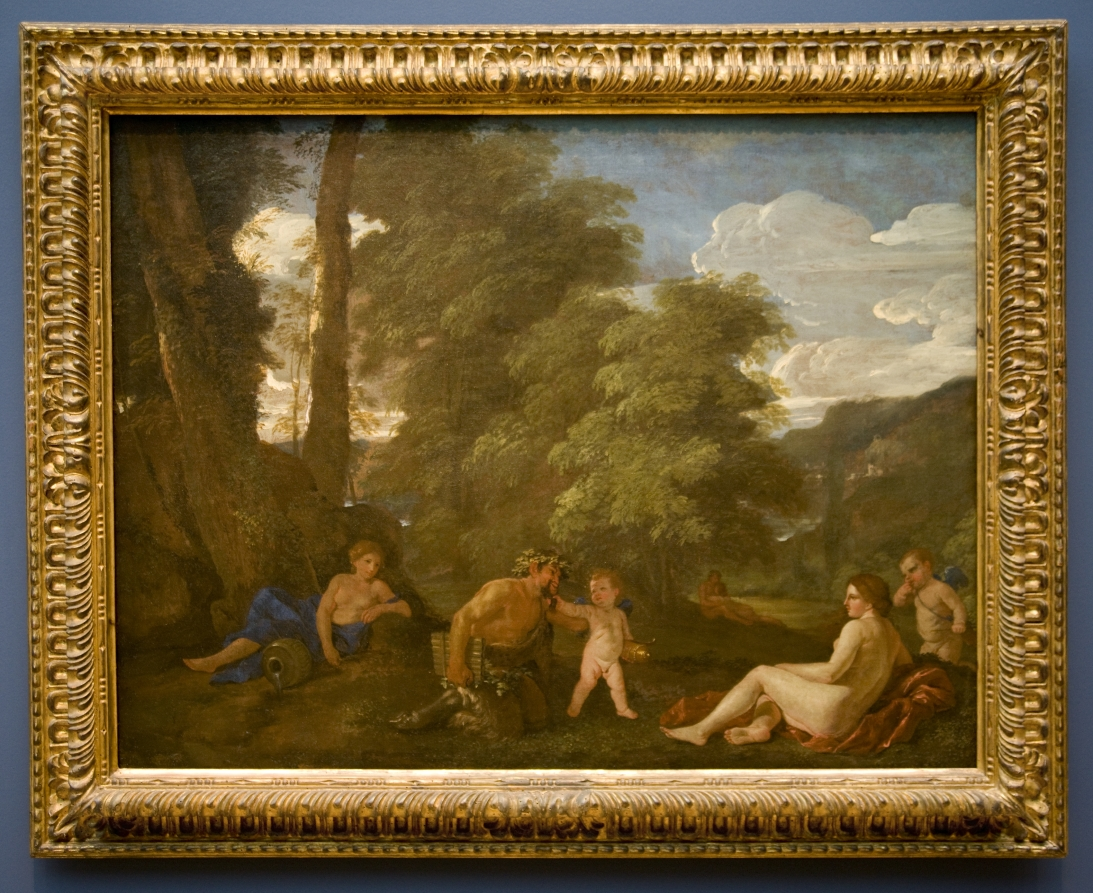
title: Nymphs and a Satyr (Amor Vincit Omnia)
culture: France, 17th century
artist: Nicolas Poussin (French, 1594–1665)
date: c. 1625–27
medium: oil on canvas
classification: Painting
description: Like his colleague Claude Lorrain, Poussin depicted historical and mythological subjects in landscapes inspired by the countryside around Rome. His themes were often complex, and frequently incorporated witty allusions to classical texts. Here, a playful cupid tugs Pan, the goatlegged Greek god of the woods, toward Venus, the goddess of love. The painting cleverly illustrates the Latin phrase amor vincit omnia, or “love conquers all” (in Greek, pan means “all”). The woodland setting represents the idyllic paradise of Pan’s home.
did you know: After arriving in Rome and experiencing financial instability, Nicolas Poussin turned to painting more popular, lucrative mythological scenes, such as those depicting nymphs and satyrs.